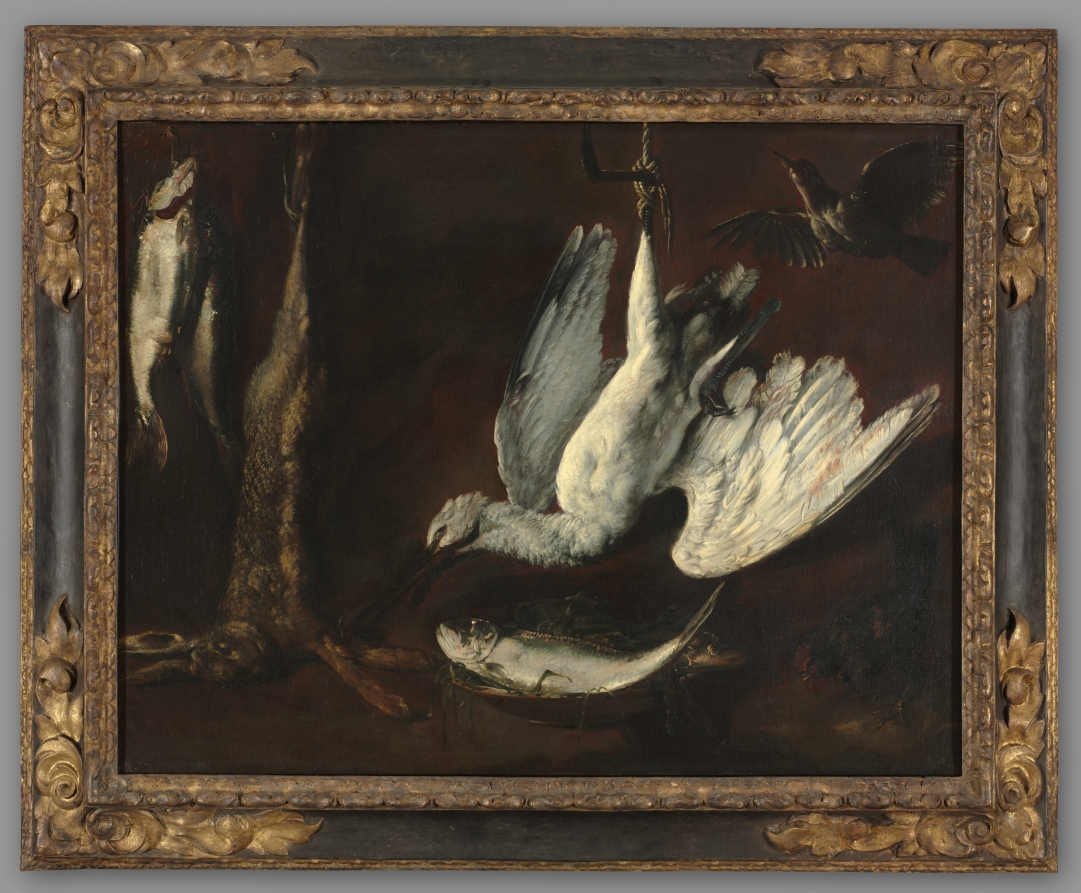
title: Hare, Spoonbill, and Fish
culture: Italy, possibly Genoa, 17th century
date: mid-1600s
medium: oil on canvas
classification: Painting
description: This striking painting of fish and game has yet to be attributed to a specific artist. Art historians have considered Dutch, Spanish, or Italian artists as possibilities, including the Dutch still-life and animal specialist Frans Snyders and the Spanish artist Alejandro de Loarte. But both have been rejected on stylistic grounds. An Italian artist is more plausible; the vaguely rendered, reddish background and the fluid handling of paint, especially in the portrayal of the fish, are characteristic of an Italian hand. The composition, which emphasizes the space between the creatures with strong highlights and deep shadows, also points to an Italian artist, possibly from a Northern Italian city such as Genoa.